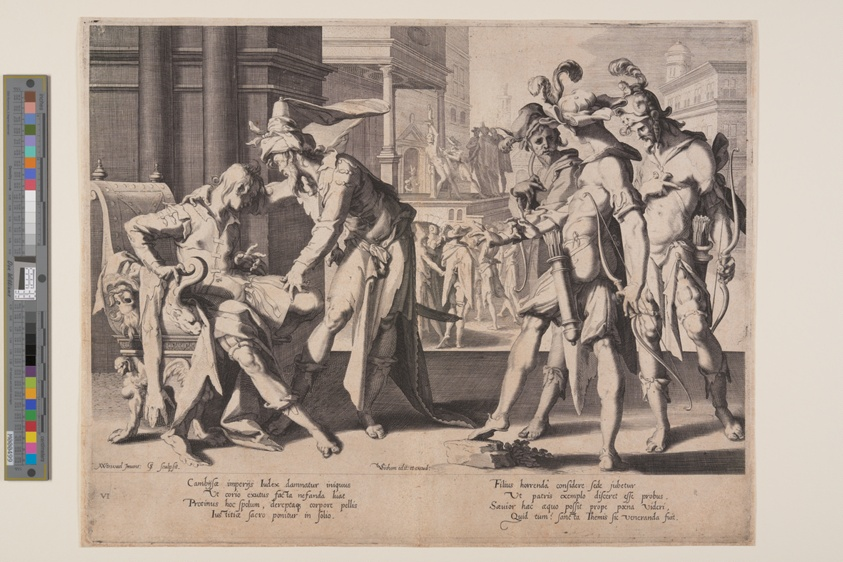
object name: Print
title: Cambyses Commanding Flaying, plate 6 from Thrones of Justice (Thronus Iustitiae)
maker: Willem van Swanenburgh (Dutch, 1580–1612); after Joachim Wtewael (Dutch, 1566–1638)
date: 1606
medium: Engraving on ivory laid paper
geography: Netherlands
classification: print; paper; prints and drawing; engraving